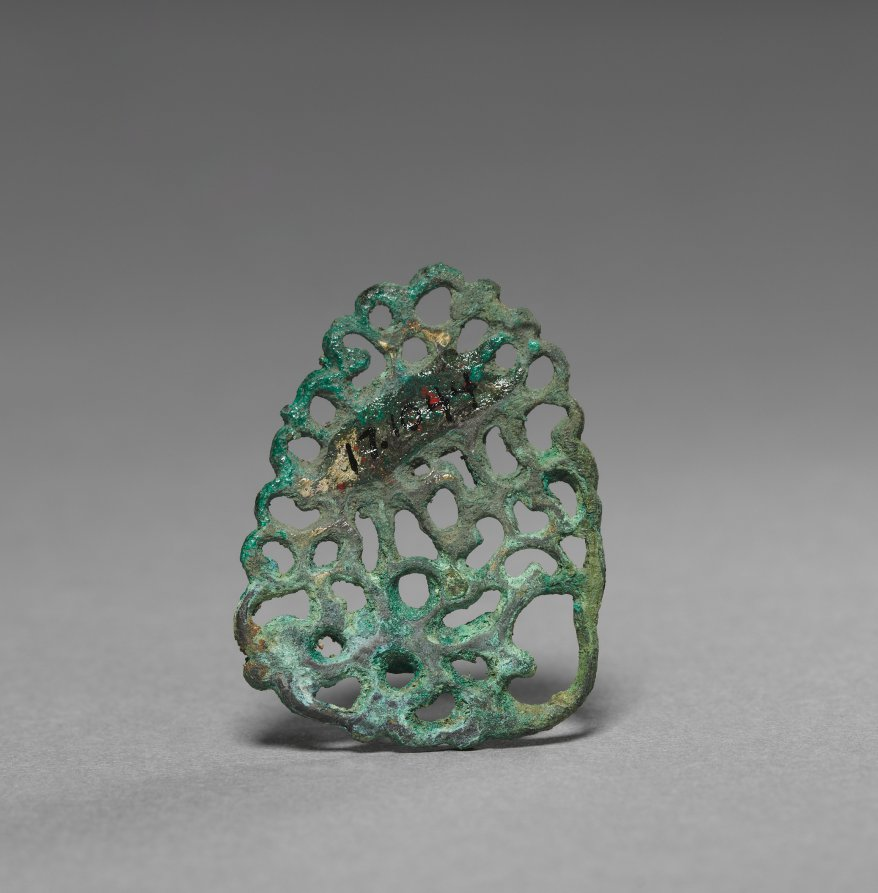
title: Ornament with Heron and Turtle Design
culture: Korea, Goryeo dynasty (918–1392)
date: 1100s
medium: bronze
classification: Metalwork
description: Metalworking techniques advanced remarkably during the Goryeo period (918–1392). Sophisticated metal objects with intricate designs were used not only as daily accessories, but also as burial goods for commemorating the dead. Traces of fibers found on the backs of these metal ornaments suggest that they were once used as brooches to hold garments together.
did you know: This metal ornament is part of a decorative brooch once used to hold clothes together.